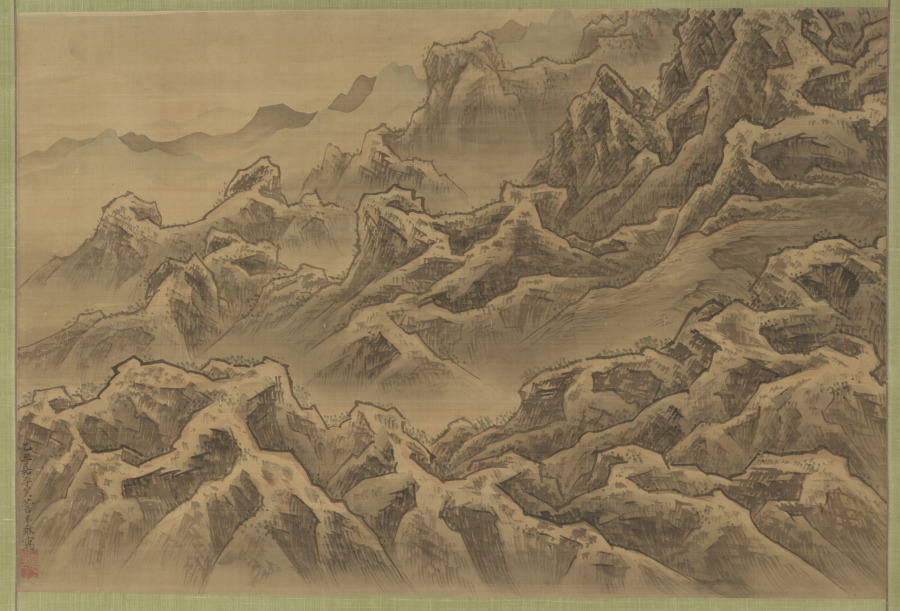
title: Mountains and Ravine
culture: Japan, Edo period (1615–1868)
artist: Suzuki Fuyō (Japanese, 1749–1816)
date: 1805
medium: hanging scroll; ink and color on silk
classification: Painting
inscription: Artist's signature and seal lower left